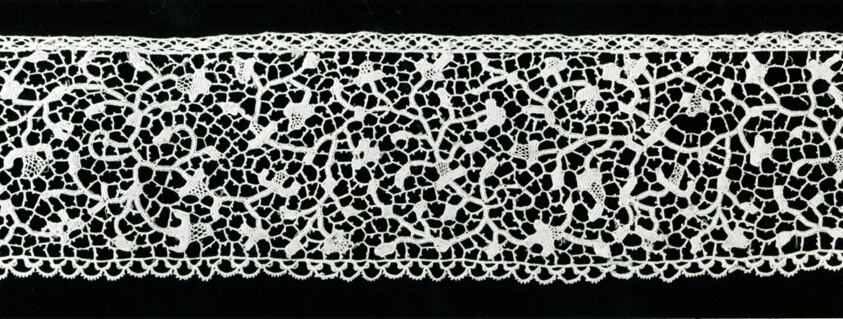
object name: Textile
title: Border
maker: Europe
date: c. 1700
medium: Linen, needle lace, coraline pattern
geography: Europe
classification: textile; lace - needle; lace